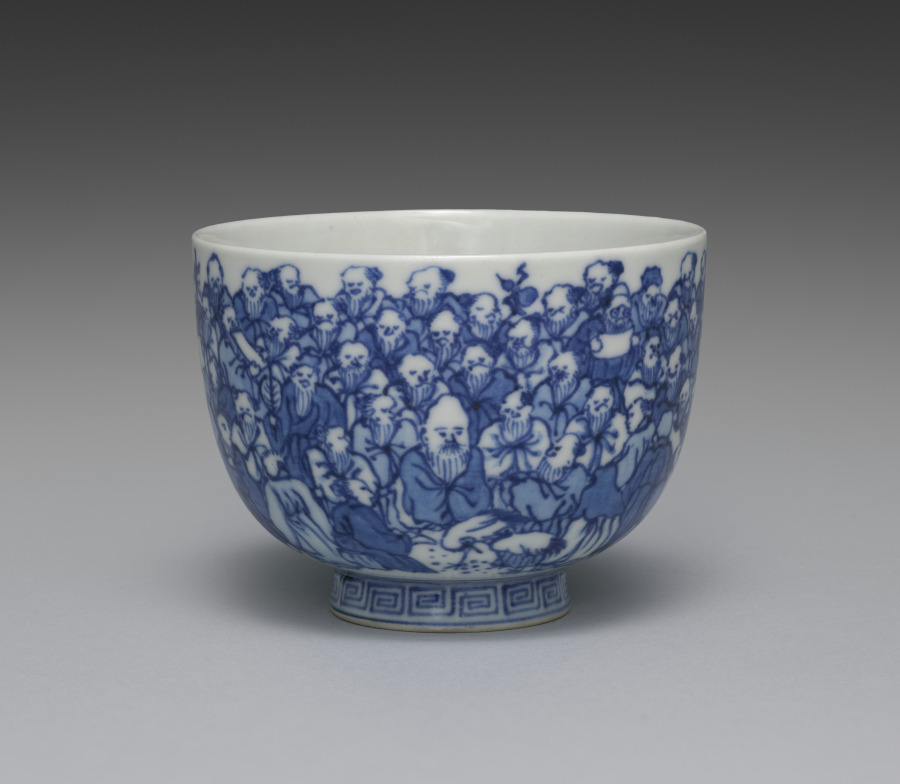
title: Teacup from Teacups with a Hundred Sages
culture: Japan, Meiji period (1868–1912)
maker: Seifū Yohei III (Japanese, 1851–1914)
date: 1893–1914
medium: One from a set of five teacups; porcelain with underglaze blue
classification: Ceramic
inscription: 清風造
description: Each of these five teacups has a painting of identical design in underglaze blue, but as the tiny figures are drawn entirely by hand, each cup has its own personality. The theme of the sencha cups is an assembly of sages or immortals, literally “a hundred venerable [people]” (hyakurō). The myriad figures crowd the scene in groups. The god of longevity, with his tall forehead, sits with his cranes, having flown in from Mt. Penglai on the Isle of the Immortals. Seven long-bearded sages sit around a stone table, chatting and drinking; one is seated on an enormous gourd. Of course, there is a stack of books on the table, and elsewhere, scrolls are being written upon or read—in one case held very close by a sage who is wearing glasses. The design was enormously popular in ceramics made for those engaged in literati culture.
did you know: Seifū Yohei III (1851–1914) produced many works for tea gatherings where people drank Chinese-style leaf-tea (sencha).